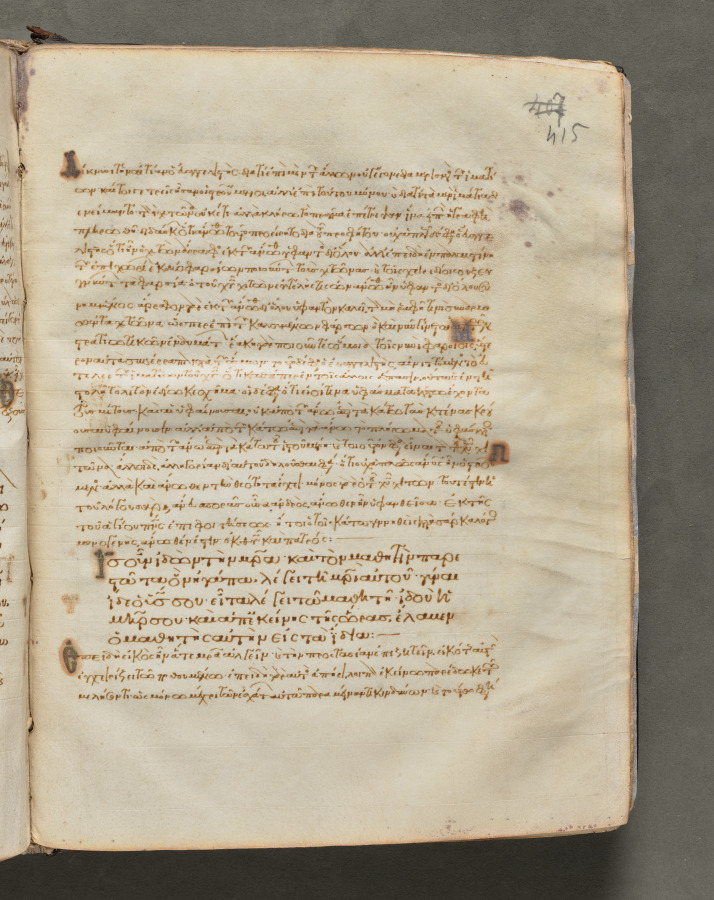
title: Text, folio 415 (recto), from a Gospel Book with Commentaries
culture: Byzantium, Constantinople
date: c. 1000–1100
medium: ink, tempera, and gold on vellum; leather binding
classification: Bound Volume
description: Each of the four gospels in this book opens on a page with brilliantly illuminated borders depicting the author of the text as well as birds—principally peacocks, symbols of the immortality of the soul—and fountains, representing the fountain of life and the salvation of the soul. This volume consists of 428 leaves with texts in Greek. Its level of sophistication suggests that it was probably written and decorated in a monastery in Constantinople.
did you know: Gospel books were carried in procession through Byzantine churches.